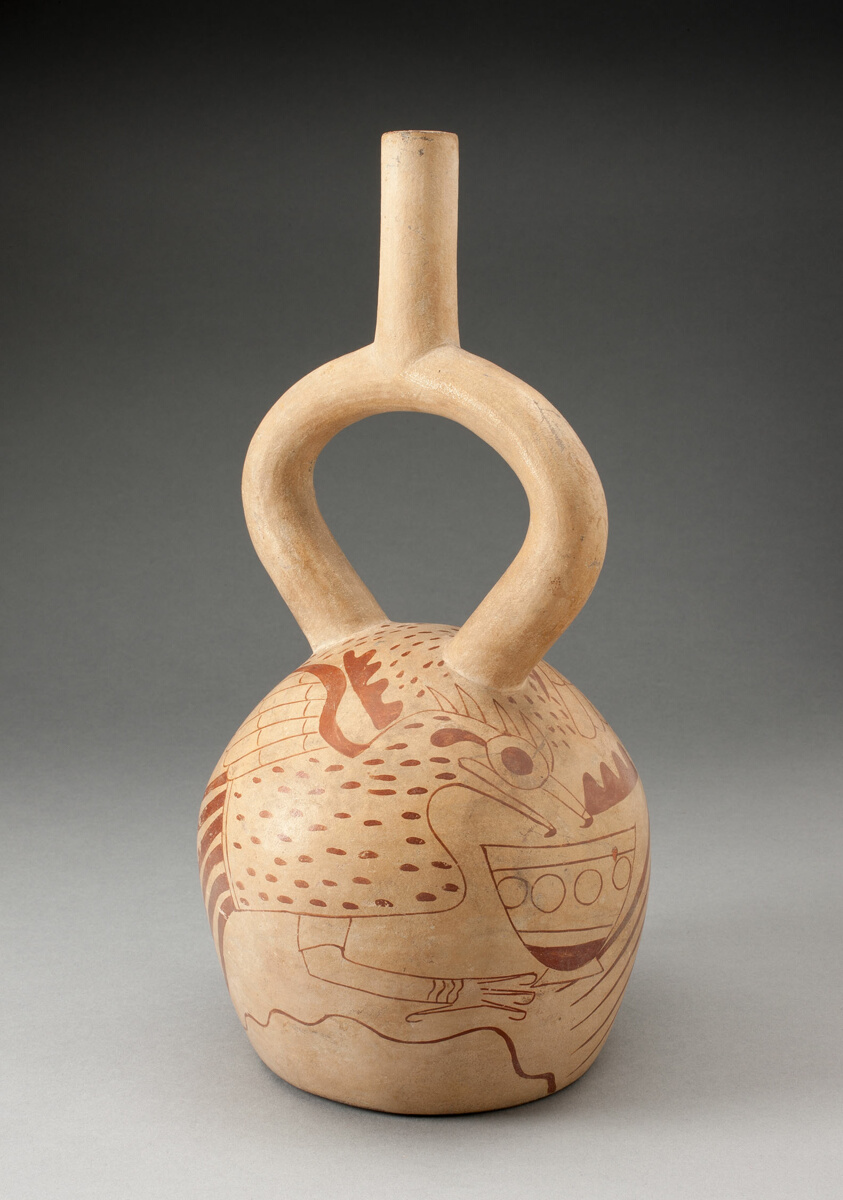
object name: Vessel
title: Stirrup Spout Vessel with Fineline Bird Motifs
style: moche, Arts of the Americas, andes, south american, andean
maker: Moche (North coast, Peru)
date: 100 BCE–500 CE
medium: Ceramic and pigment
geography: Peruvian North Coast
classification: earthenware; ceramics; vessel; art of the americas